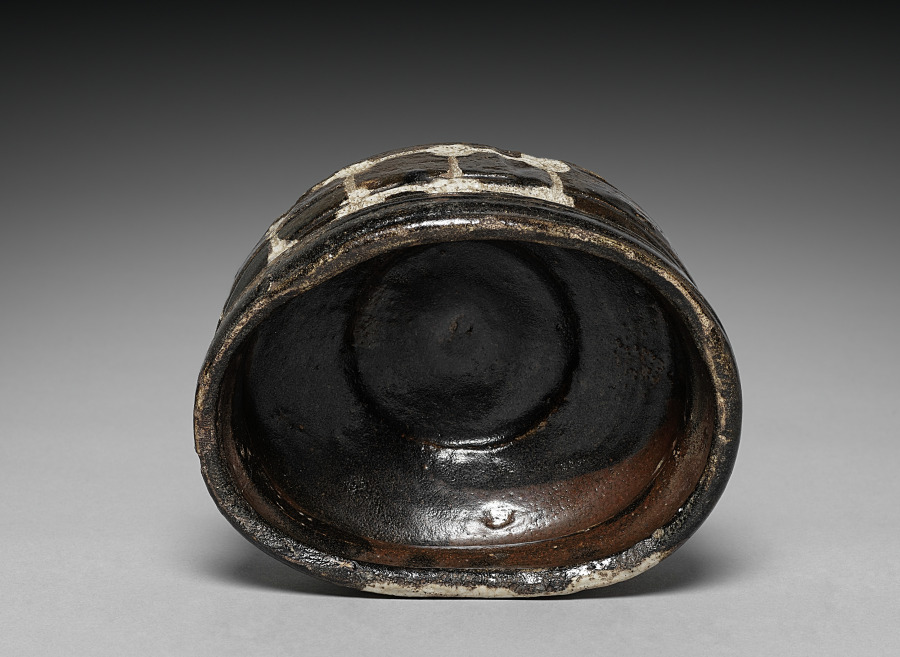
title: Clog-shaped Teabowl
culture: Japan, Momoyama period (1573–1615)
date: early 1600s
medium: Glazed stoneware (Mino ware, Oribe type)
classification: Ceramic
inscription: Mark: cross on base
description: Tea gatherings are fundamental to Japanese culture. Teabowls like this one are the most important objects used in tea practice. Its oblong shape and bold abstract designs are the signature style of the time period in which it was produced. That style is called Oribe, named for the tea master who championed the aesthetic.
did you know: Oribe is a government position. It means the person in charge of textiles.